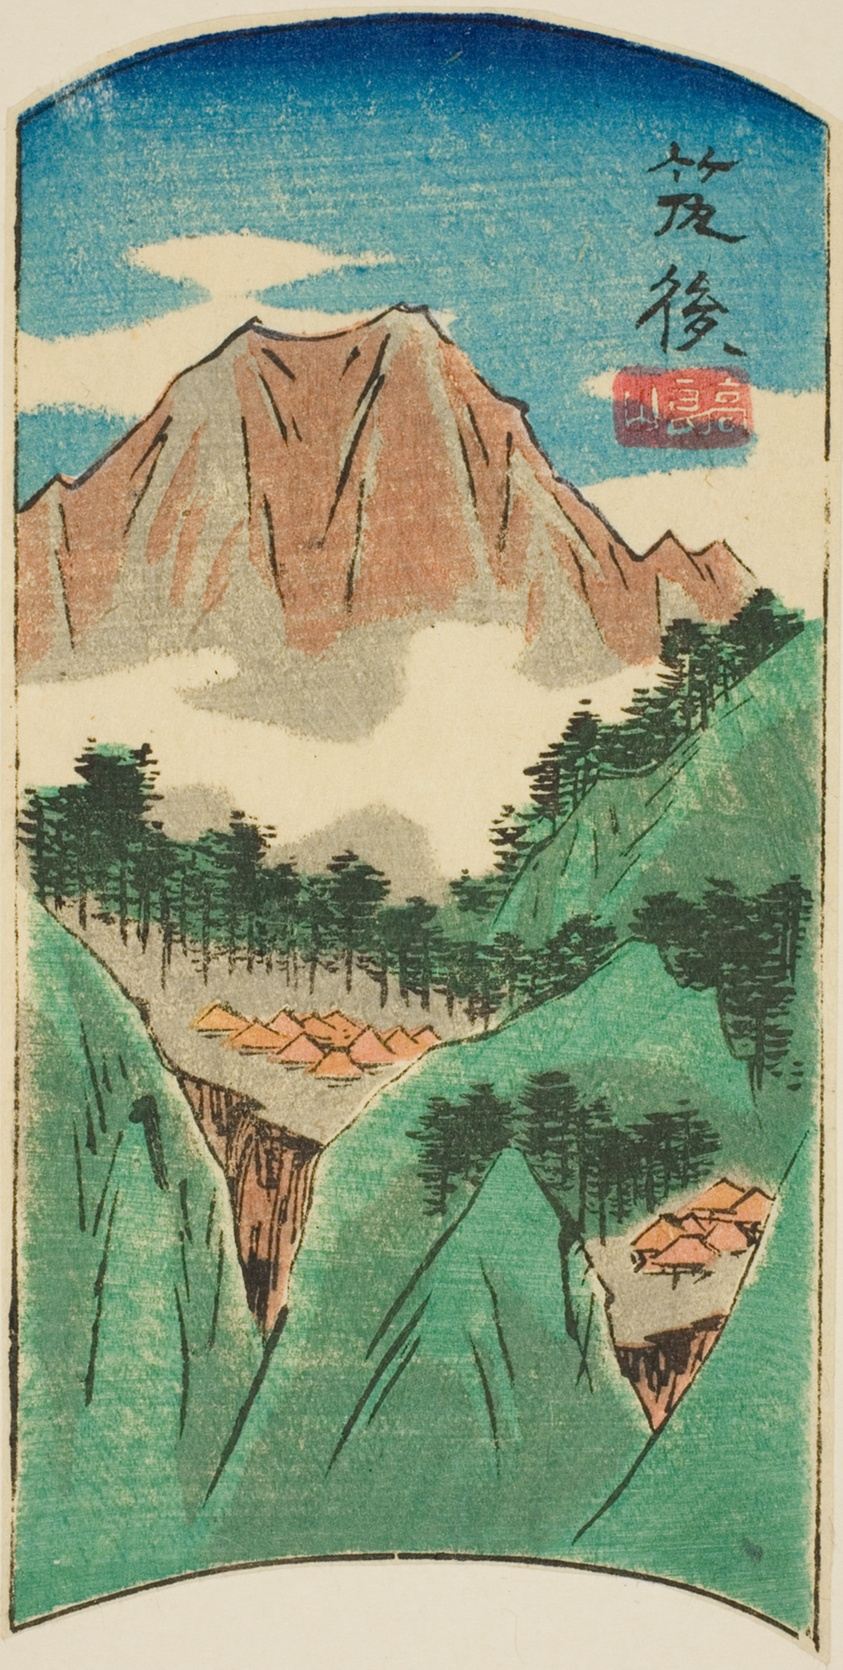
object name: Print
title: Chikugo, section of sheet no. 17 from the series "Cutout Pictures of the Provinces (Kunizukushi harimaze zue)"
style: Japanese (culture or style)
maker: Utagawa Hiroshige 歌川 広重; Japanese, 1797-1858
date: 1852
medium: Color woodblock print; section of harimaze sheet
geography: Japan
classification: woodblock print; print; asian art